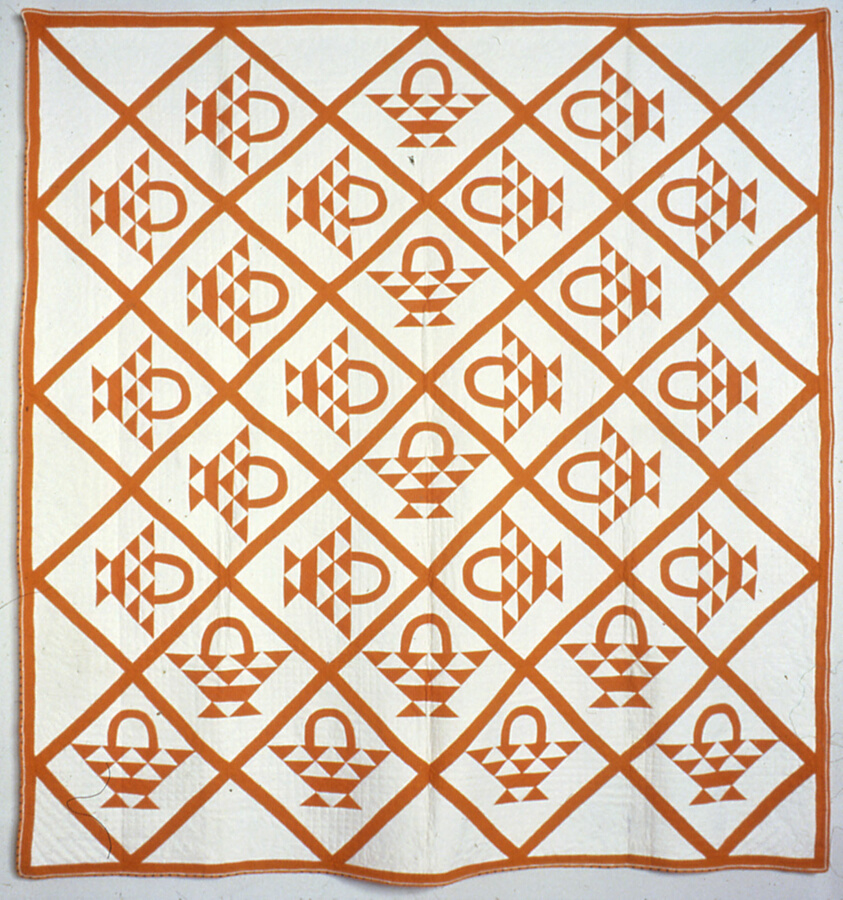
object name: Textile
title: Bedcover (Cherry Baskets)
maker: United States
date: c. 1862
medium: Cotton, plain weave; appliquéd with cotton, plain weave, printed; quilted; backed with cotton, plain weave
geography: United States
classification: textile; needlework - quilt